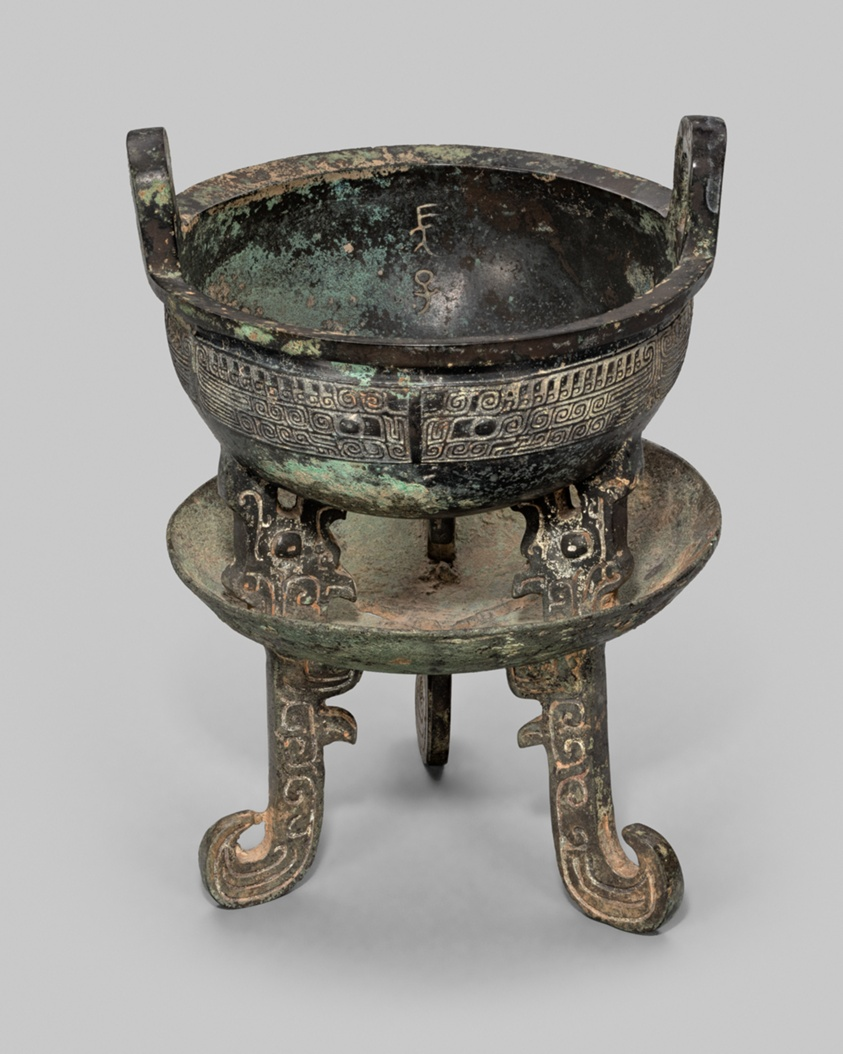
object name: Vessel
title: Small Tripod Cauldron of Chang Zi (Chang Zi ding)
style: Chinese (culture or style)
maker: China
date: Western Zhou dynasty, 1046–771 B.C.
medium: Bronze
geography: China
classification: bronze; metal; vessel; asian art